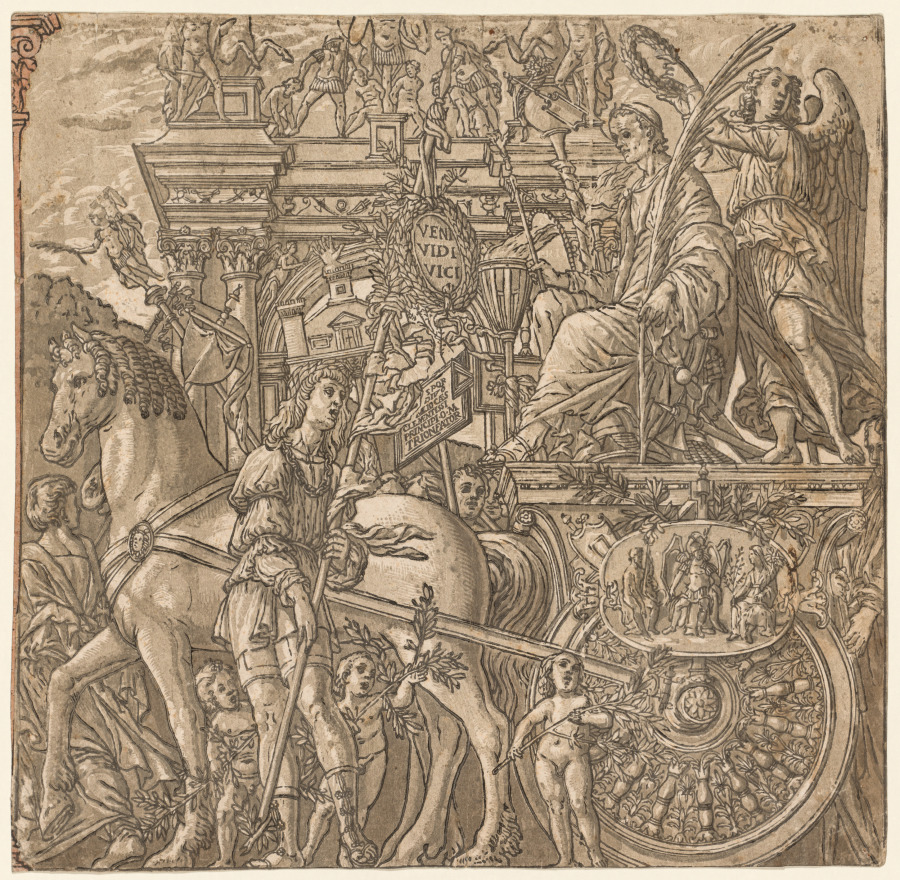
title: The Triumph of Julius Caesar: Caesar Triumphant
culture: Italy, 16th century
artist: Andrea Andreani (Italian, about 1558–1610)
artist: after Andrea Mantegna (Italian, about 1431–1506)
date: 1593–99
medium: chiaroscuro woodcut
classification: Print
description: Enthroned in an elaborate chariot, Caesar rides past a triumphal arch. He holds a palm branch, the traditional attribute of Victory, depicted here as the winged allegorical figure holding a laurel crown above Caesar’s head. Ancient reports of triumphs agree this task was typically assigned to a slave. The words VENI, VEDI, VICI on the banner famously translate as “I came, I saw, I conquered.”